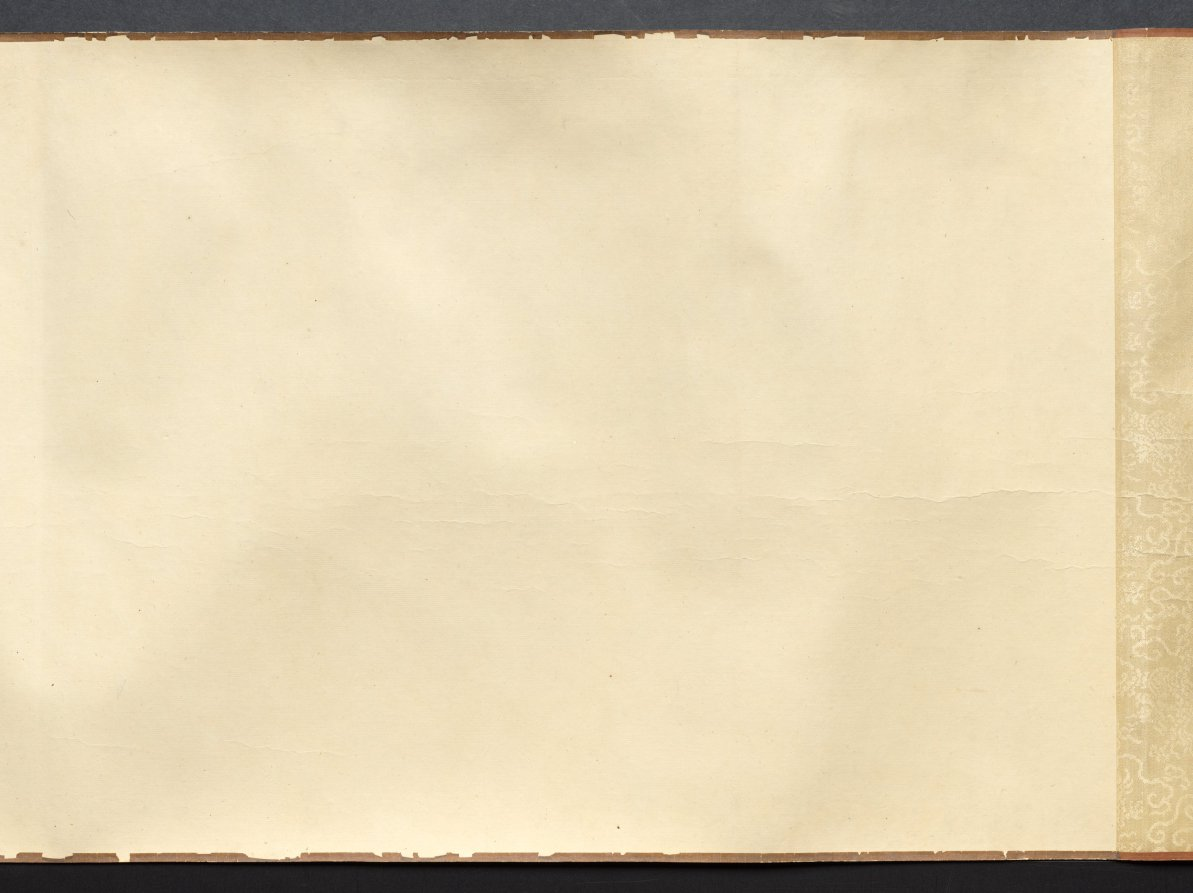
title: Returning to the Village in a Rainstorm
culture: China, Ming dynasty (1368–1644)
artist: Xie Shichen (Chinese, 1487–after 1567)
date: 1530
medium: Handscroll; ink and light color on silk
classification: Painting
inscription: 風雨歸村圖 嘉靖庚寅秋日樗仙謝時臣. [印] 謝時臣印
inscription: 3 additional seals unidentified.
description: This scroll depicts a wind- and rainswept landscape with figures in the countryside struggling against a late summer monsoon rainstorm. Such weather was familiar to residents of the lower Yangzi delta. Xie Shichen spent most of his life in the Suzhou area. Details of his career are scant, but his surviving works suggest that he made his living as a professional painter. This painting conveys drama and anecdotal observations, characteristic of Zhe school paintings, such as the one by Lü Wenying, CMA 1970.76.